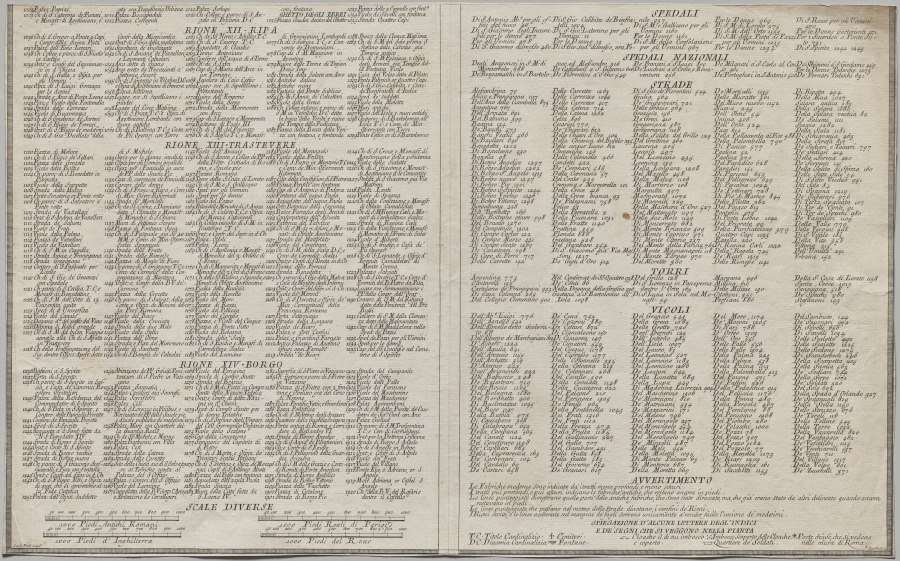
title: Nuova pianta di Roma data in luce da Giambattista Nolli l’anno MDCCXLVII, known as La Pianta Grande di Roma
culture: Italy, 18th century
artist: Giovanni Battista Nolli (Italian, 1701–1756)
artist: Carlo Nolli (Italian, 1690–1790)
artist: Rocco Pozzi (Italian, 1701–1774)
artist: Pietro Campana de Soriano (Italian, 1725–c. 1779)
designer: Stefano Pozzi (Italian, 1699–1768)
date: 1748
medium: etching and engraving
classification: Print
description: The monumental Pianta Grande di Roma, or Large Plan of Rome, which measures about 5 x 7 feet when its twelve plates are assembled, is a landmark in both cartography and printmaking. The map is considered the first scientific rendering of Rome, establishing new standards of accuracy and thoroughness when it was published in 1748. Devised by the Lombard architect and surveyor Giovanni Battista Nolli (Italian, 1701-56), the creation of the map required over ten years of surveying the city carried out by Nolli and a team of assistants with the help of new measuring devices. In Nolli’s “ichnographic” (also called “ground”) plan, architectural features and the urban infrastructure are reduced to a single horizontal slice, a minutely detailed footprint that conveys dimensions, proportions, and orientations to scale with the utmost clarity.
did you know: To make this map, Pope Clement XII granted the mapmaker permission to measure courtyards and other interior, inaccessible spaces in monastic communities, even those in nuns’ convents, which was controversial at the time.